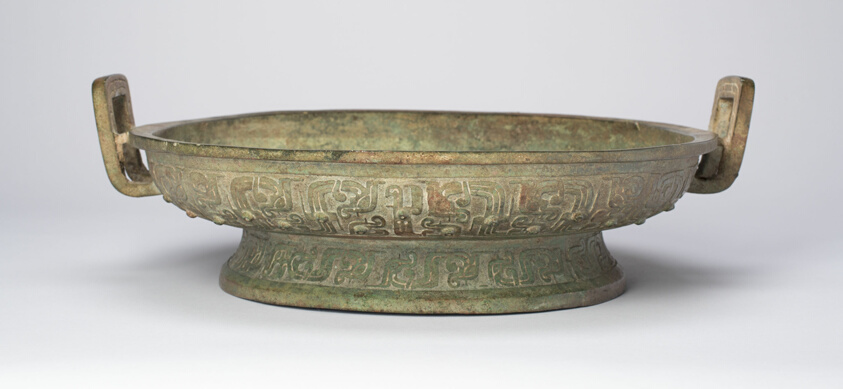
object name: Vessel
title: Water Container (Pan)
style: Chinese (culture or style)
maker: China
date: Western Zhou dynasty (c. 1050–771 B.C.), late 8th/early 7th century B.C.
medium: Bronze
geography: China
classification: container; bronze; metal; vessel; asian art